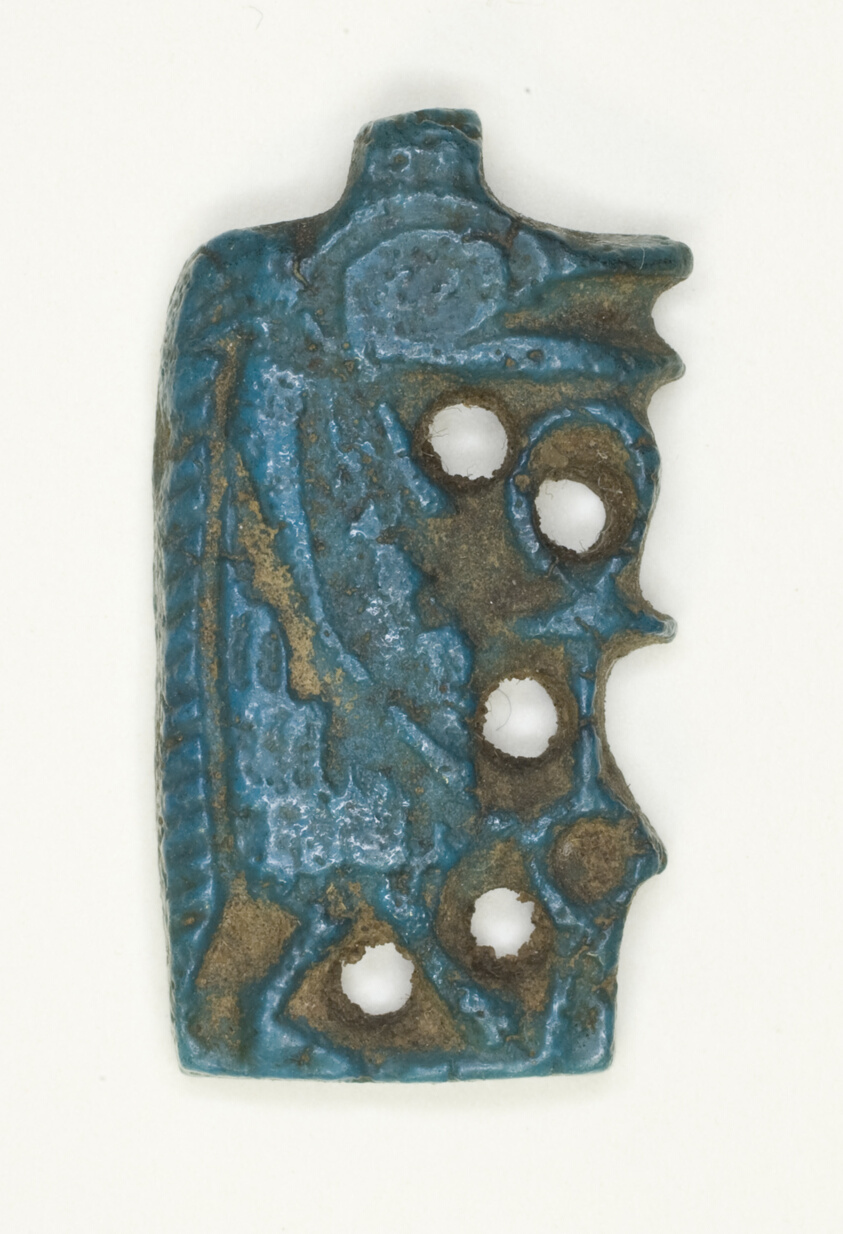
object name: Costume and Accessories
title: Amulet of the Goddess Tawaret (Thoeris) in Profile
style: egyptian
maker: Egyptian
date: New Kingdom, Dynasties 18–20 (about 1550–1069 BCE)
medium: Faience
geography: Egypt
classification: amulet; glass; jewelry; ancient art; costume; faïence (composite material)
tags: goddesses